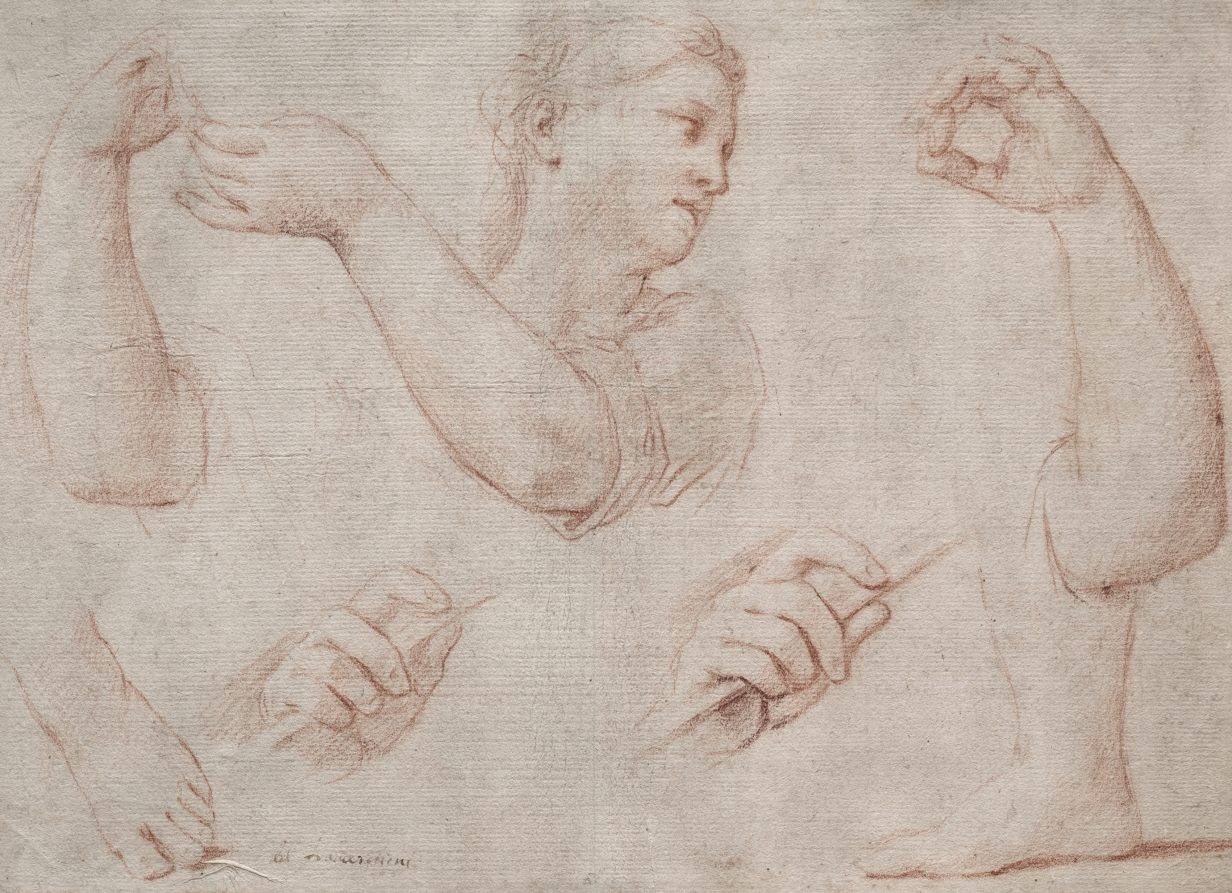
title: Study of a Young Woman Playing a Tambourine, and Studies of an Arm, Hands, and Feet (Studies for "Miriam Leading the Chorus of Women Who Give Thanks for the Routing of Pharoah"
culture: Italy, 18th century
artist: Marcantonio Franceschini (Italian, 1648–1729)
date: c. 1711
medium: red chalk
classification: Drawing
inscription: inscribed: del franceschini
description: This sheet of studies in red chalk was made in preparation for the composition Miriam Leading the Chorus of Women Who Give Thanks for the Routing of Pharaoh, a final episode in the story of the Israelites' exodus from Egypt. The Bolognese artist Marcantonio Franceschini painted the cartoon of the complete composition between 1711 and 1712, and it was used to decorate an important papal building, the Palazzo della Cancelleria in Rome, where it remains today. While the studies of feet and the head and shoulders with raised arms are for the principal figure of Miriam playing the tambourine, the arm on the right and the two hands holding a rod are studies for an attendant figure who plays the triangle behind Miriam.